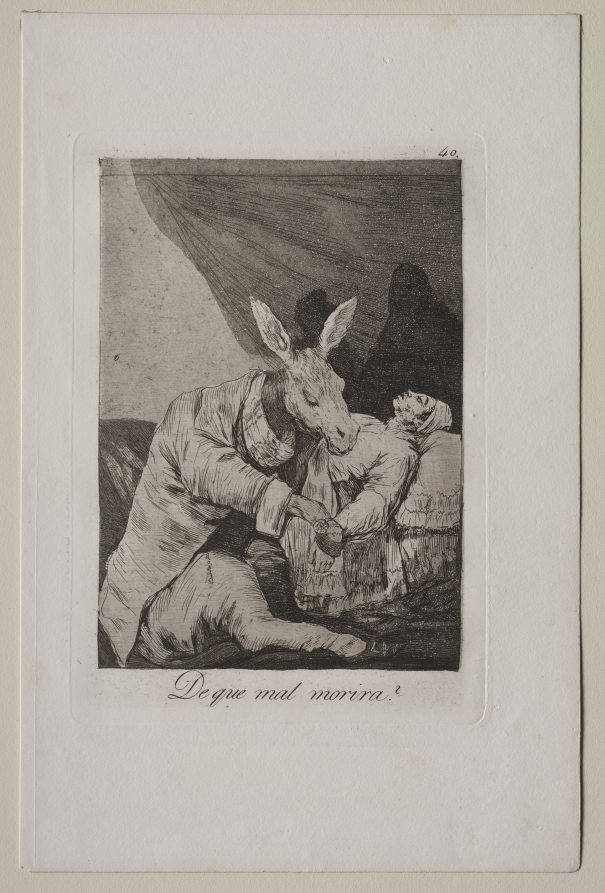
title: Of What Ill Will He Die?, Plate 40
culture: Spain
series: Los Caprichos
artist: Francisco de Goya (Spanish, 1746–1828)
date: 1799 (printed c. 1855)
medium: etching and aquatint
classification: Print